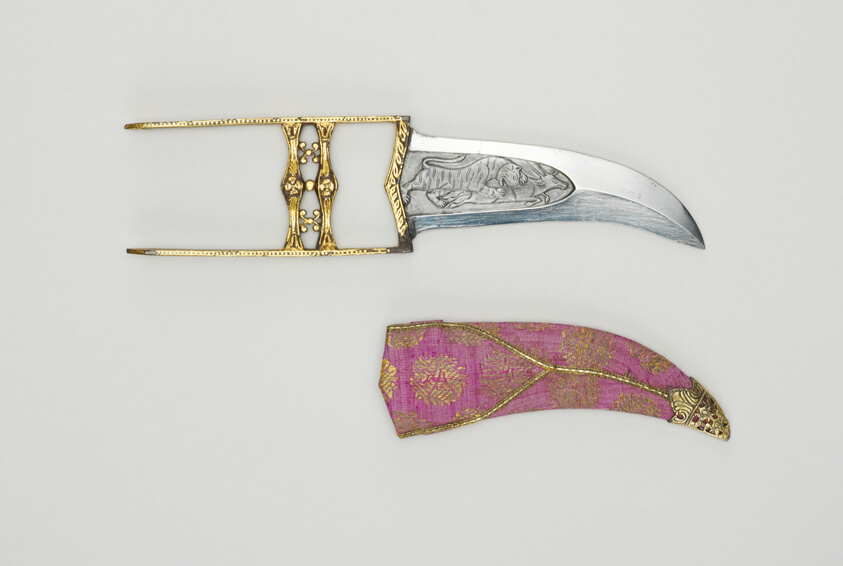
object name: Decorative Arts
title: Dagger (Katar)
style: South Asian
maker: India; Rajasthan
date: 18th century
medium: Steel and gold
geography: India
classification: metal; weapon; asian art; knife weapons; decorative arts